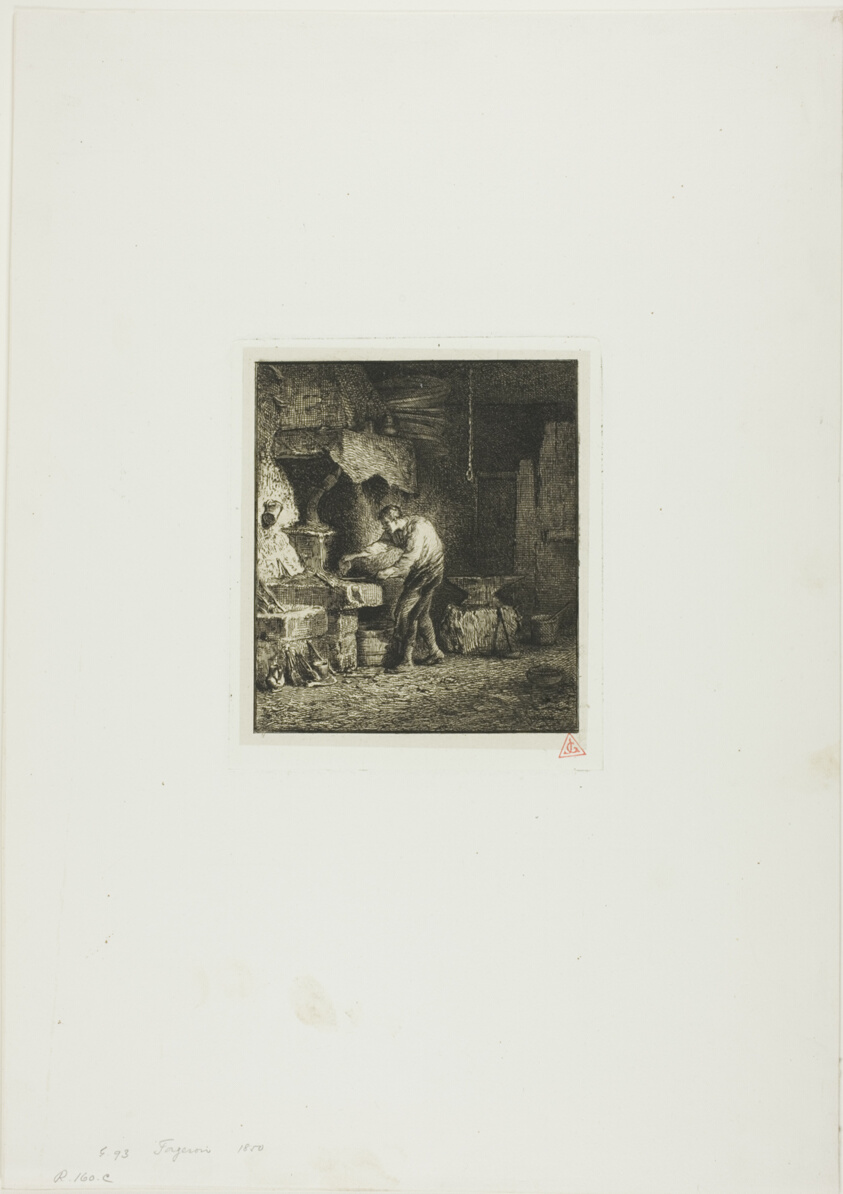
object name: Print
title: Blacksmith Facing Left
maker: Charles Émile Jacque (French, 1813-1894)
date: 1850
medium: Etching, engraving and roulette on cream China paper laid down on ivory wove paper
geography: France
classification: etching; print; prints and drawing